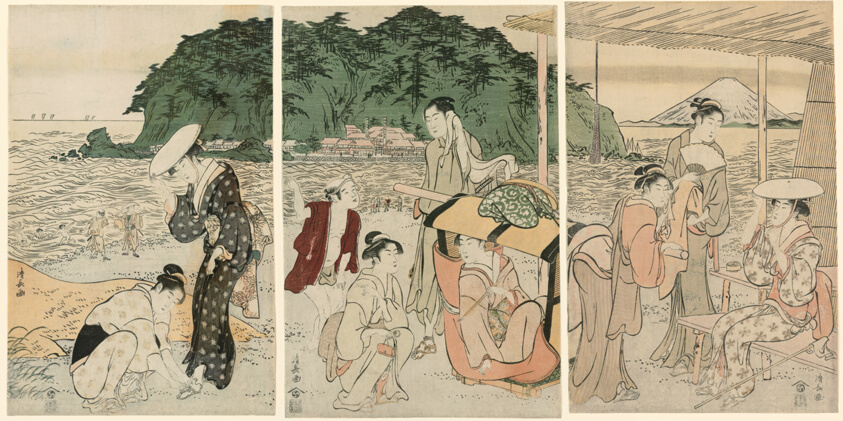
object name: Print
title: Visitors to Enoshima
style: Japanese (culture or style)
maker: Torii Kiyonaga (Japanese, 1752-1815)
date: c. 1789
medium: Color woodblock prints; oban triptych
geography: Japan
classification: woodblock print; print; asian art